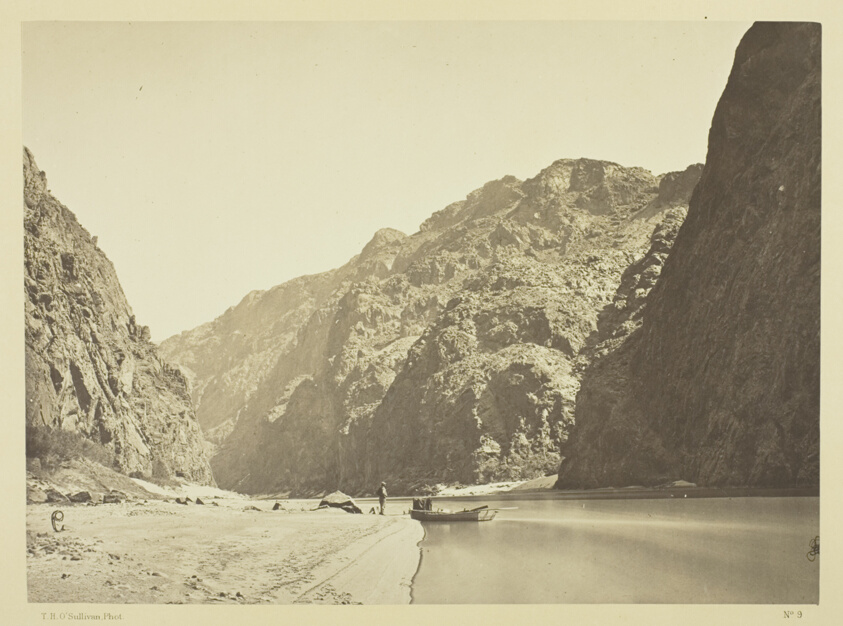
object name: Photograph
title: Black Cañon, looking above from Mirror Bar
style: 19th century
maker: Timothy O'Sullivan (American, born Ireland, 1840–1882)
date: 1871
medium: Albumen print, from the album "Geographical & Geological Explorations & Surveys West of the 100th Meridian," vol. 2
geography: United States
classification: albumen print from collodion negative; photograph; photography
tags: Collected by Hugh Edwards